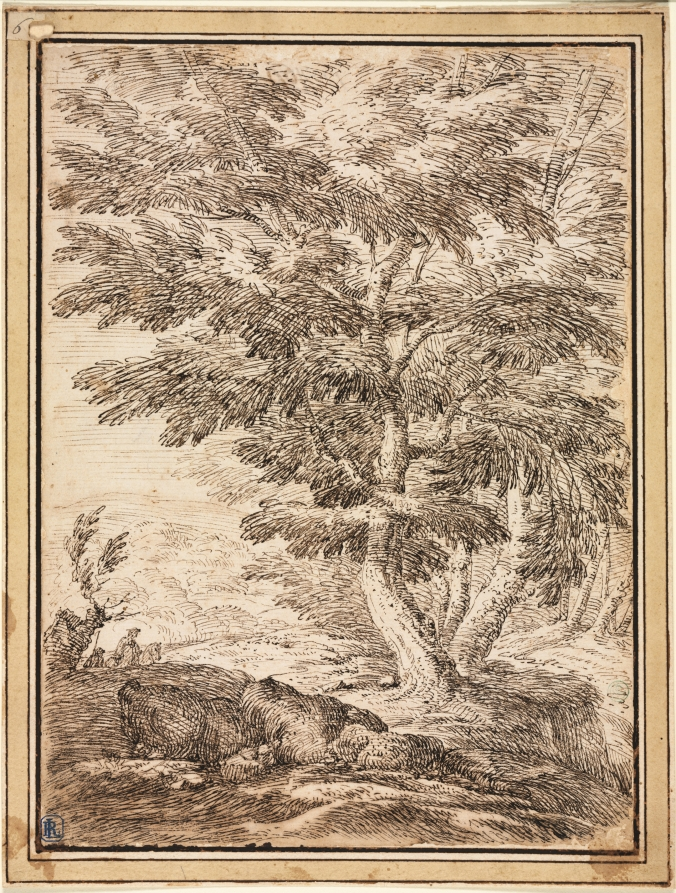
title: Landscape with Clump of Trees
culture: Italy, Bologna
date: 1600s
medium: pen and brown ink, with brush and brown wash(?)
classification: Drawing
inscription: RECTO OF SECONDARY SUPPORT (on separately applied piece of paper), upper left, in brown ink: 6 ; VERSO OF SECONDARY SUPPORT, upper center, in black chalk: [113?] [circled; crossed out in blue pencil] ; upper right, in orange crayon: 697 ; upper center, in black ink: 152 ; lower right, in graphite: Muziano ; lower right, in black chalk: [Girol?] / 1518 - 1590